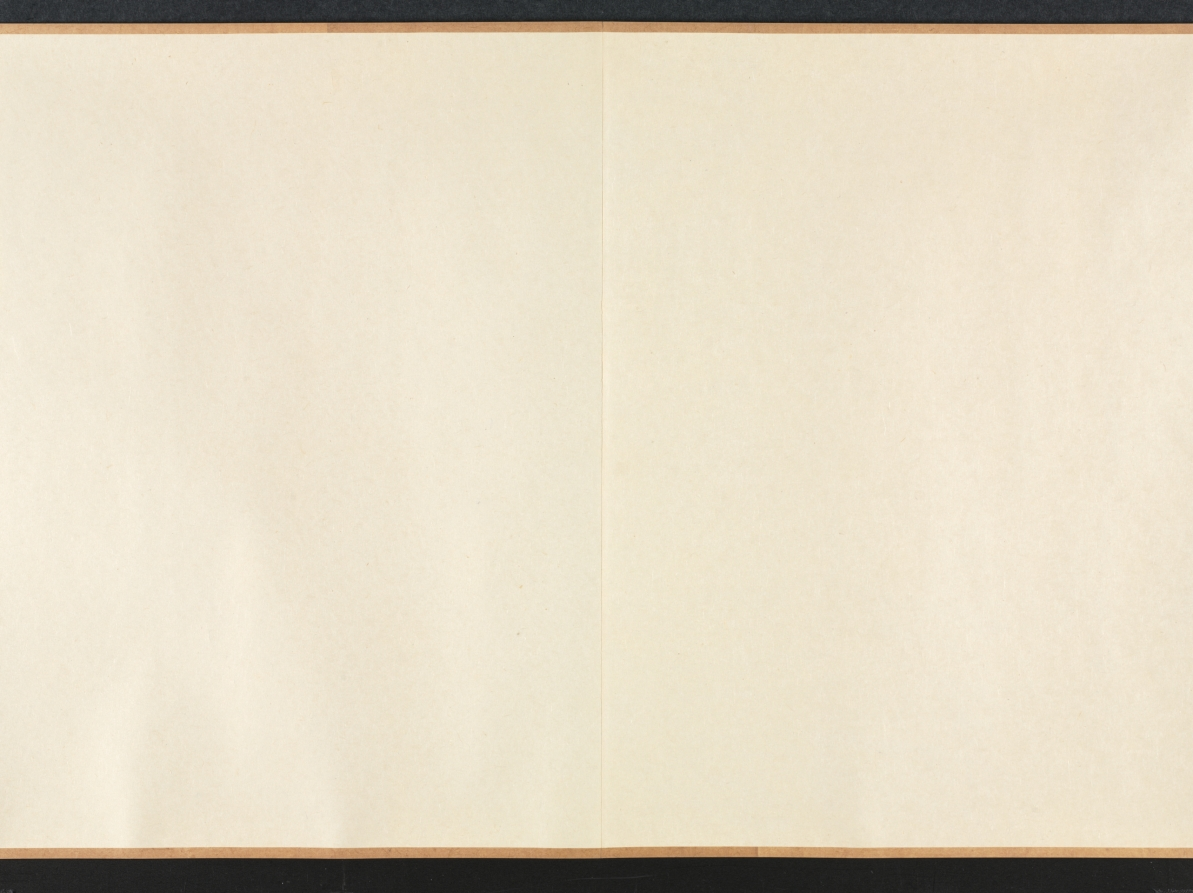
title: Hall of Lofty Pines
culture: China, Qing dynasty (1644-1911)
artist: Wang Hui (Chinese, 1632–1717)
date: 1703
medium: handscroll; ink and color on paper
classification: Painting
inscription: [題] 松喬堂圖 康熙癸未夏六月, 海虞耕煙散人王翬畫。[印]王翬之印; 石谷. [左下] 來青閣; 耕煙野老時年七十有二.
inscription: 松喬堂圖一卷，海虞石谷王君為靜海近公厲少司冦公作也。圖成于癸未之夏。未幾而公遂仙去。公令子今編修君南湖屬余題跋其後。余與公同官侍從，交契最深。側見公之清修純德，蔚為聖天子所眷重。侍直內廷，密勿贊襄，幾二十餘年。蒼生之所以受賜，士林之所以沐德者，天下莫能窺，在廷莫能悉。而公卒不言。以故宸衷日益契，恩禮亦日益渥。雖年逾懸車，時有歸老之念。而上固不聼公之去。其所謂松喬堂者，御書以賜公者也。蓋以松比公之清風勁節，而歲寒不改，經霜彌茂。則又以期公之壽考未有艾焉。公知此身未易乞，而山林槃磵之樂，止可寄諸寤思。此松喬堂圖之所由作也歟。石谷此圖，結構精密，筆墨超邁。其寫樹木之蒼蔚，堂宇之靚幽。恍見摩詰輞川樂天廬山之勝。獨惜公未得一日徜徉故園以償其願。即繪於圖亦未得以永其趣，此編修君之所以眷眷不忘也。雖然千歳之松喬，下蔭百畝，上以修棟梁之需。然則上當日名堂之意，不更望於後之人襲其芘而養其材也哉。吾願編修君之寶斯圖。并望君之塗塈丹雘，大其堂構也已矣。 康熈丙戍重陽三日，雲間王鴻緒跋。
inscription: 10 additional seals: 1 seal of Li Duna 勵杜納 (1628–1703); 4 seals of Zha Ying 查瑩 (jinshi of 1766); 5 seals of Li Yun (dates unknown).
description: Wang Hui 王翬, a leading painter in the orthodox school of the early Qing dynasty (1644–1911), was commissioned to paint this landscape with a country estate for Li Duna 勵杜納 (1628–1703), vice minister of justice in Emperor Kangxi’s court. The emperor had honored Li by granting him a piece of calligraphy with the name of Li’s retirement retreat, “Hall of Lofty Pines.” He drew a comparison between pines and Li’s upright character, resilience, and longevity. Wang Hui’s painting was supposed to allow Li to imagine living in a beautiful, secluded compound among the hills and pines. Sadly, Li died before seeing the completed painting and before receiving the emperor’s permission to retire. The landscape begins with peaceful riverbanks and low hills. The pines around the estate in the middle of the handscroll are truly lofty, some stretching even beyond the frame of the painting. Li Duna, the estate’s owner, is shown twice in his serene mountain retreat: first approaching the entrance to the compound with two servants at the right, and then later in the scroll, to the left, reading in the comfort of an inner room.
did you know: One servant carries the estate owner's carefully wrapped qin, a type of zither.